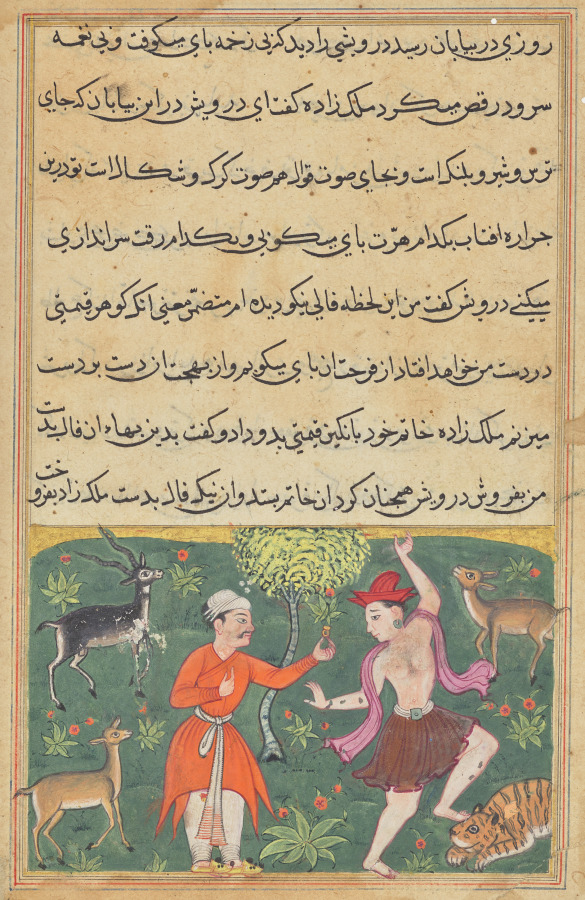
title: The prince meets a carefree dancing dervish whose good fortune he purchases for his ring, from a Tuti-nama (Tales of a Parrot): Eighteenth Night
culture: Mughal India, court of Akbar (reigned 1556–1605)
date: c. 1560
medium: gum tempera, ink, and gold on paper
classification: Painting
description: The prince, in the orange tunic, had been exiled by his older brother who inherited the throne, so he decided to travel the country. In a wilderness he met a dancing dervish to whom wild animals seemed mystically drawn; the deer are unconcerned about the tiger nearby. Dervishes are Sufi holy men whose dances bring them closer to god, but in this ironic story, the dervish dances for joy, because he just perceived an omen that he was about to become rich. The prince handed him his signet ring in exchange for the dervish’s good fortune.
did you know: The animals in the wilderness include a tiger, two does, and a blackbuck.